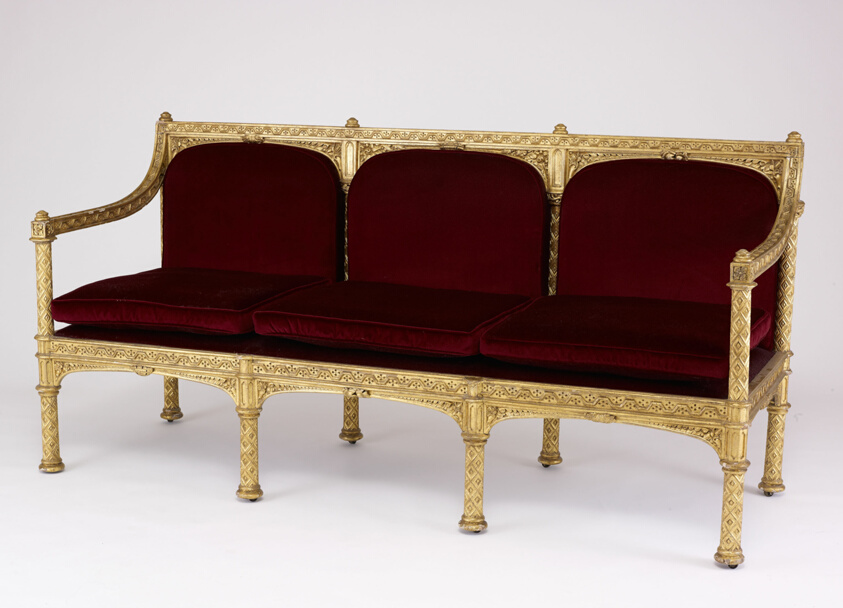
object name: Furniture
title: Sofa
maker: Designed by James Wyatt; English, 1746-1813; Made by John Russell; active 1773-1822; England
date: 1807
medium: Gilded beechwood, gilt bronze, and velvet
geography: London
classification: seating; furniture; european decorative arts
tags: furniture